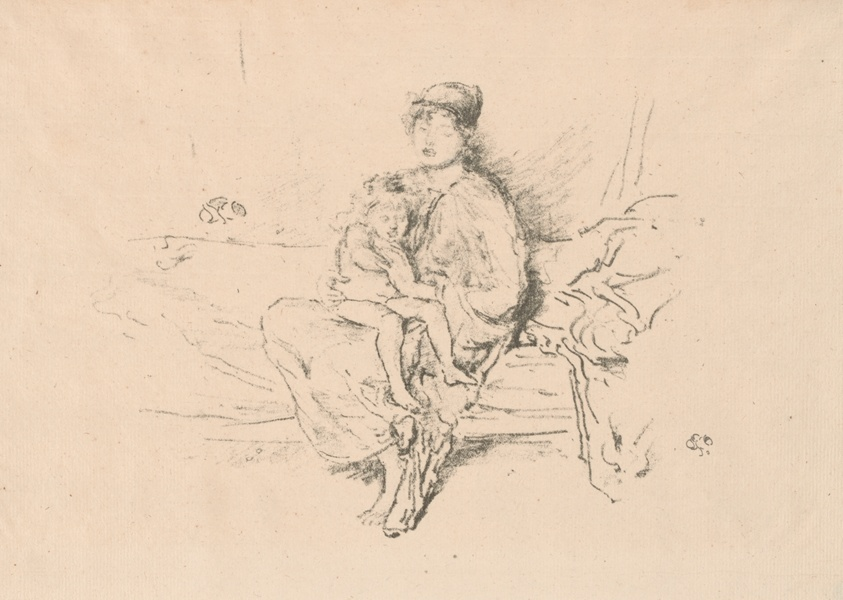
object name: Print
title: Mother and Child, No. 2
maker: James McNeill Whistler (American, 1834-1903)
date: 1891, printed 1895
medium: Transfer lithograph in black on cream laid paper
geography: United States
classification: transfer lithograph; lithograph; print; prints and drawing; paper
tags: mothers, children